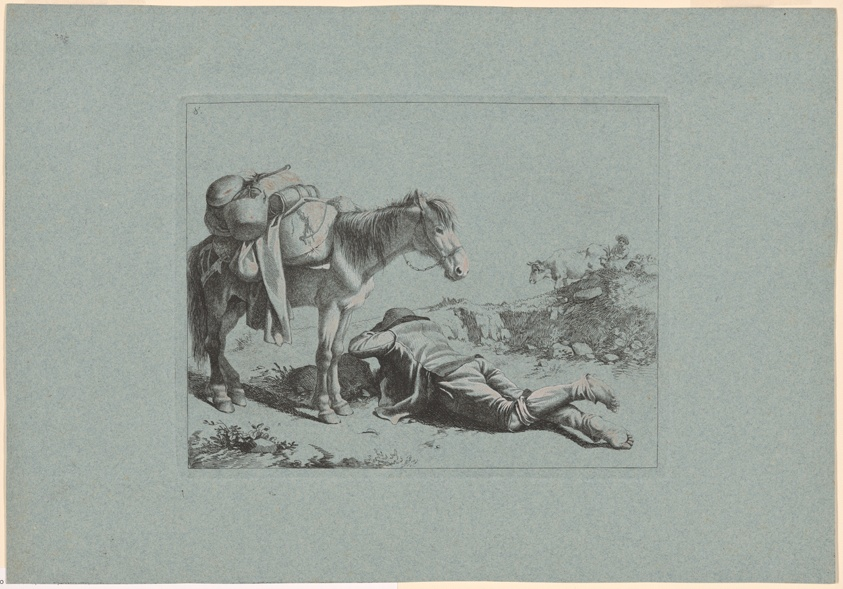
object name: Print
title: Plate 8, from The Set of 12 Pastorals Scenes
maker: Francesco Londonio (Italian, 1723-1783)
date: 1762-63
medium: Etching in black, with white opaque watercolor on blue wove paper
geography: Italy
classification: etching; paper; print; prints and drawing